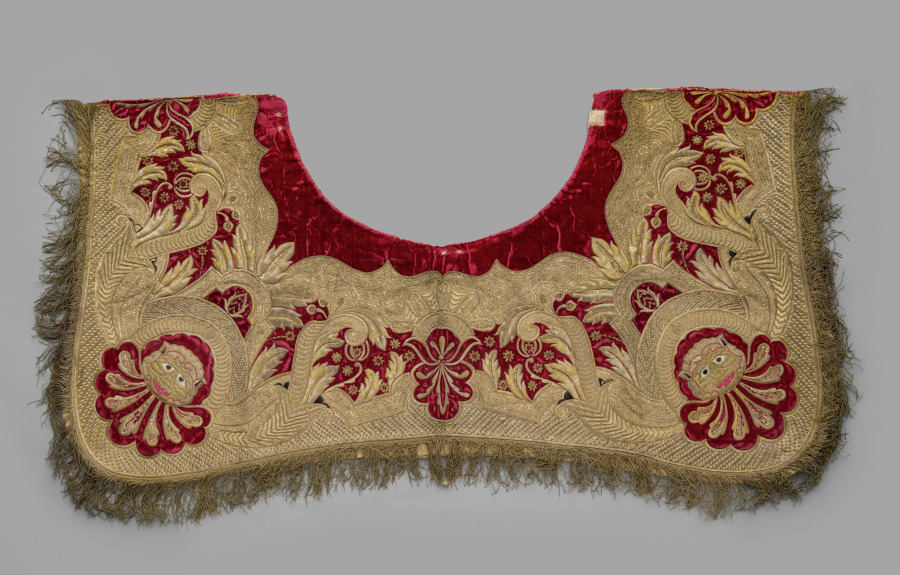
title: Gold Embroidered Saddle Ornament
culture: Spain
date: 1700s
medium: embroidery; gold metallic thread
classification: Embroidery